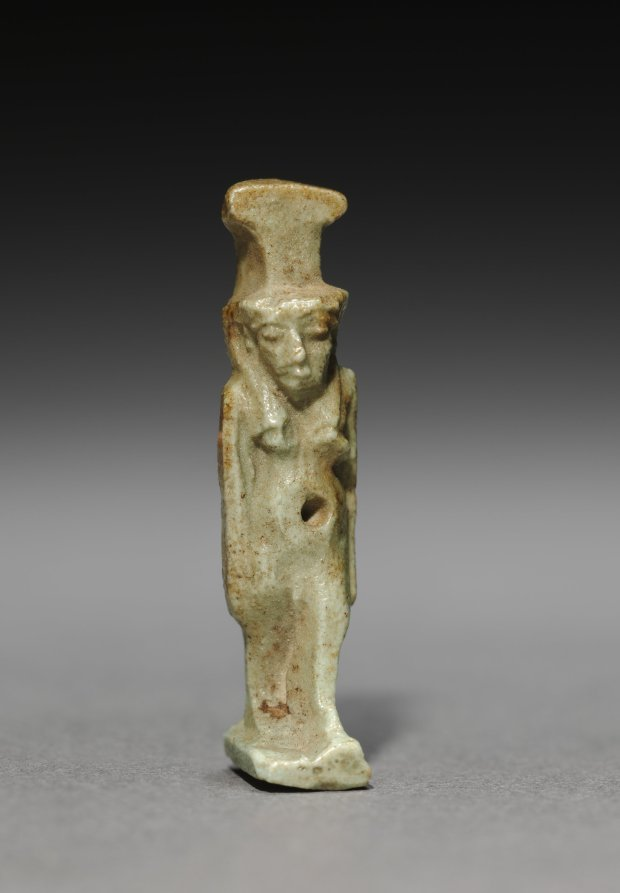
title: Amulet of Nephthys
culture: Egypt, Late period (715–332 BCE), Dynasty 30–Greco-Roman period (332 BCE–395 CE), Ptolemaic dynasty (305–30 BCE)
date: 380–30 BCE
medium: gray green faience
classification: Amulets